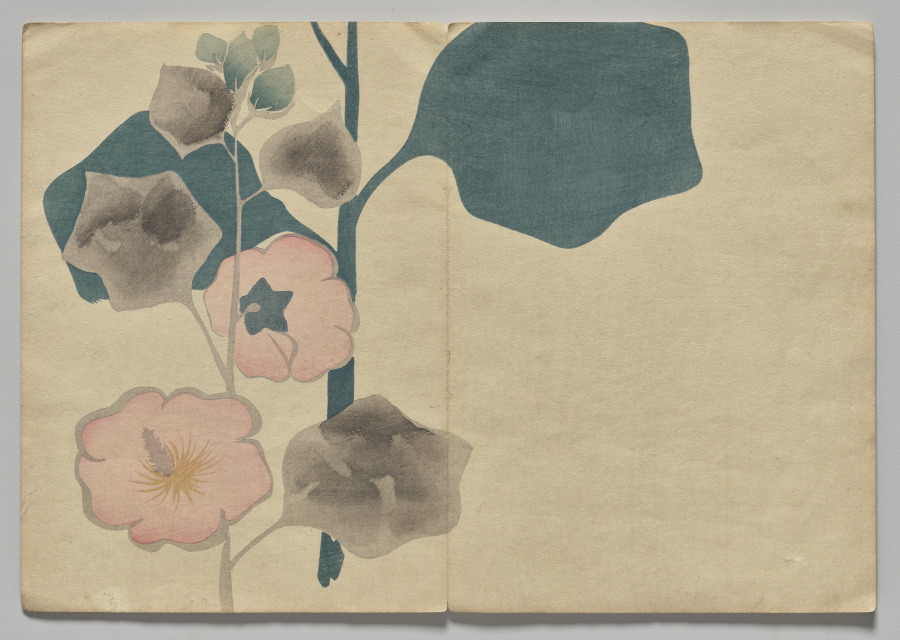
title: Scene from The Kōrin Picture Book (Volume 2)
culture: Japan, Edo period (1615–1868)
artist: Nakamura Hōchū (Japanese, d. 1819)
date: 1800s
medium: color woodblock printed book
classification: Bound Volume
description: Ogata Korin (1658-1716) was one of the most admired artists of Rimpa, or "decorative school painting." These books by the charming later-generation Rimpa artist Hochu record Korin's inventive designs.